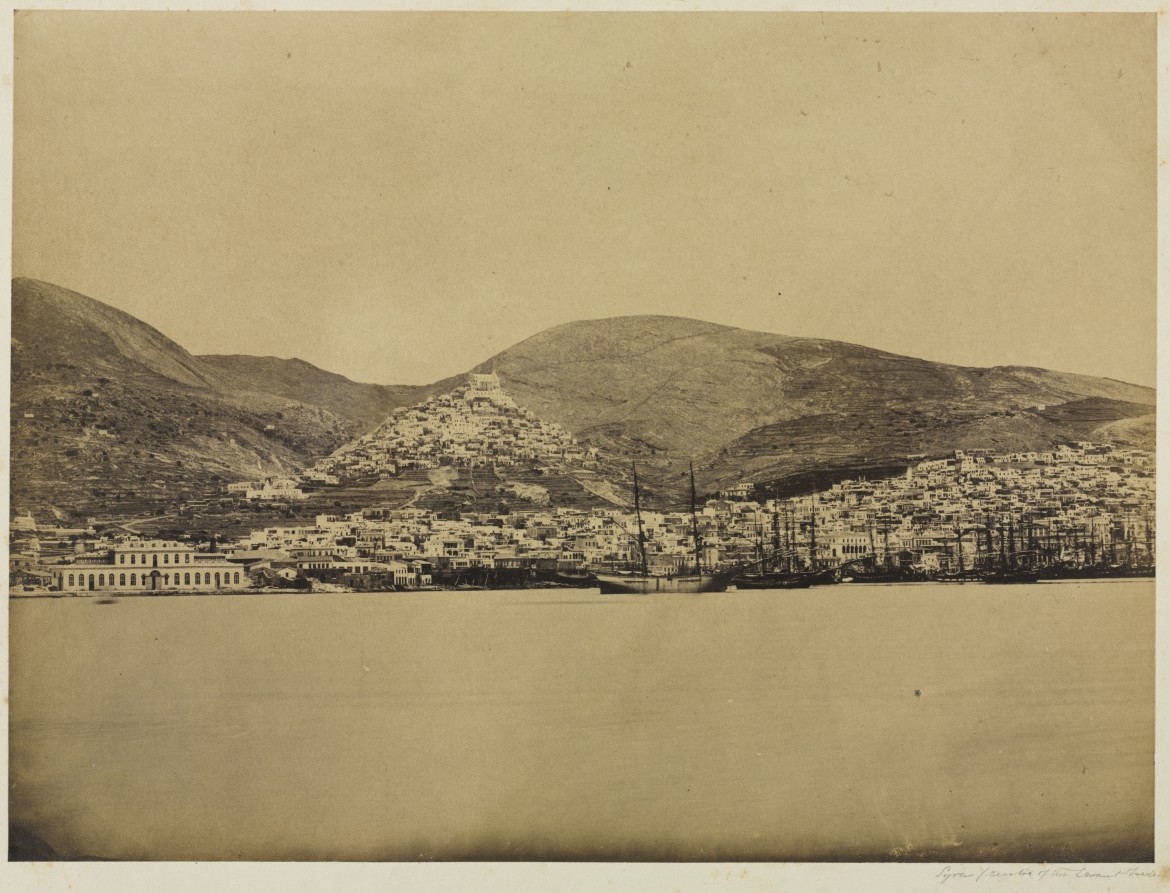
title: Syros, Center of the Levant Trade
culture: Greece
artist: Dimitrios Constantin (Greek, 1820–1900)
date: about 1865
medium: albumen print from wet collodion negative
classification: Photograph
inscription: Written in pencil on recto of mount: "Syra. / .Centre of the Levant Trade./"; "G1032"; in brown ink: "Syra, Centre of the Levant Trade"; in pencil on verso: "G1032"; "Louis De Clercq / Syria trip 1859-60"